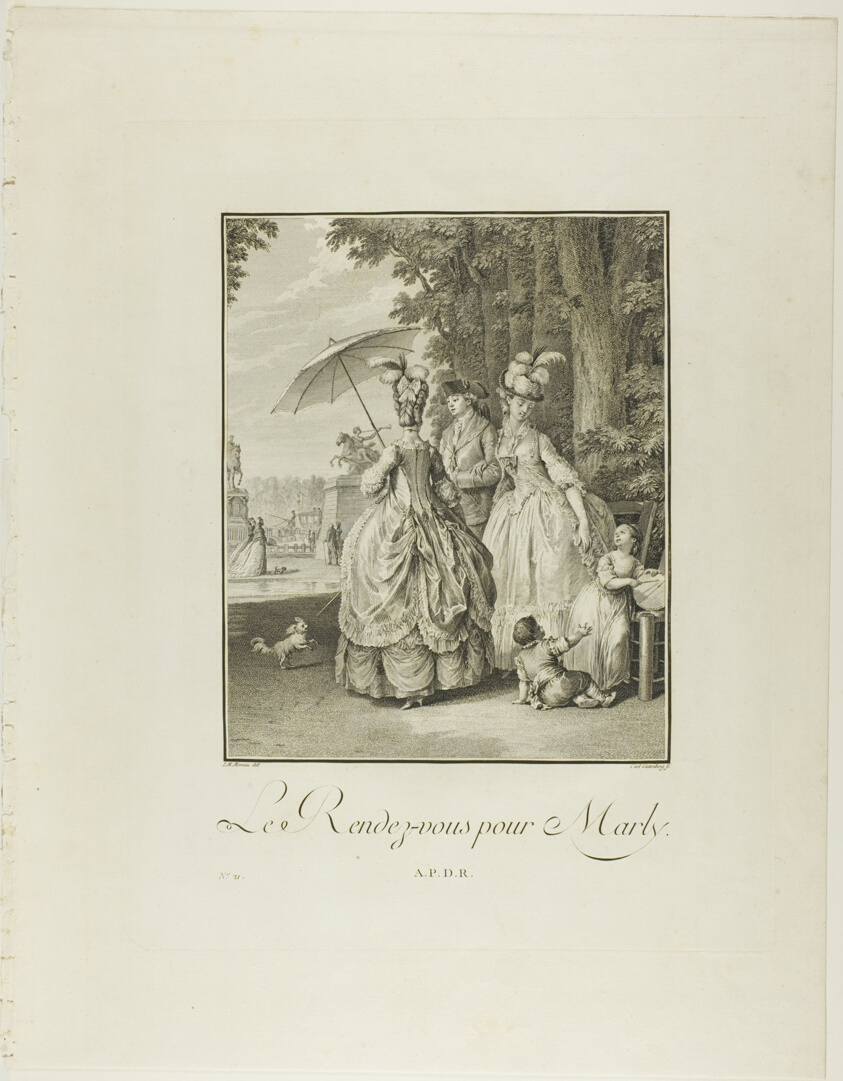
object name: Print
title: Rendezvous For Marly, from Monument du Costume Physique et Moral de la fin du Dix-huitième siècle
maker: Heinrich Guttenberg (German, 1749-1818); after Jean Michel Moreau (French, 1741-1814); published by Laurent-François Prault (French 1712-1780)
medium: Engraving on paper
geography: Germany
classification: etching; print; prints and drawing